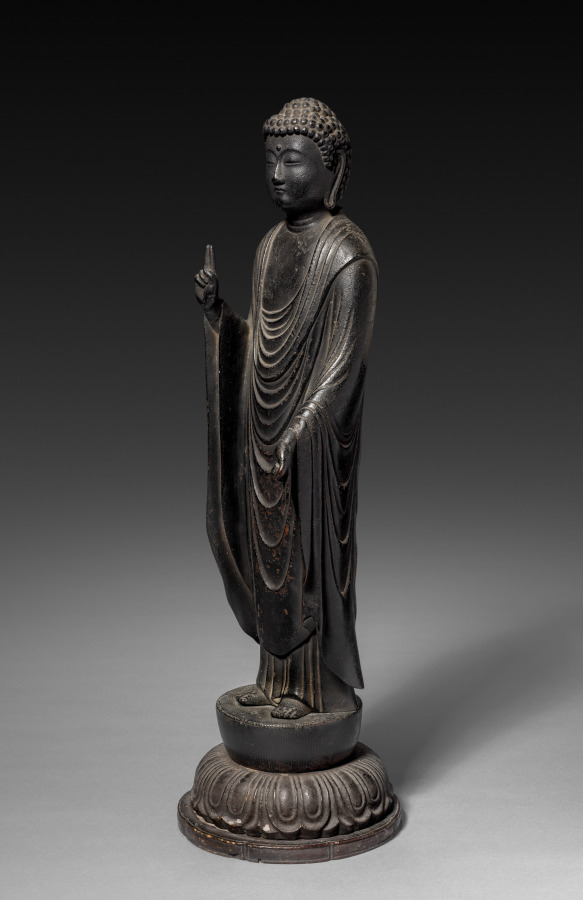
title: Amida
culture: Japan, Kamakura period (1185–1333) to Nanbokuchō period (1336–92)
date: 1300s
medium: patinated bronze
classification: Sculpture